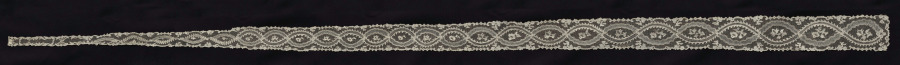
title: Lace Lappet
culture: France, Argentan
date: 1715–74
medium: Linen: needle lace (Point de Argentan)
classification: Lace